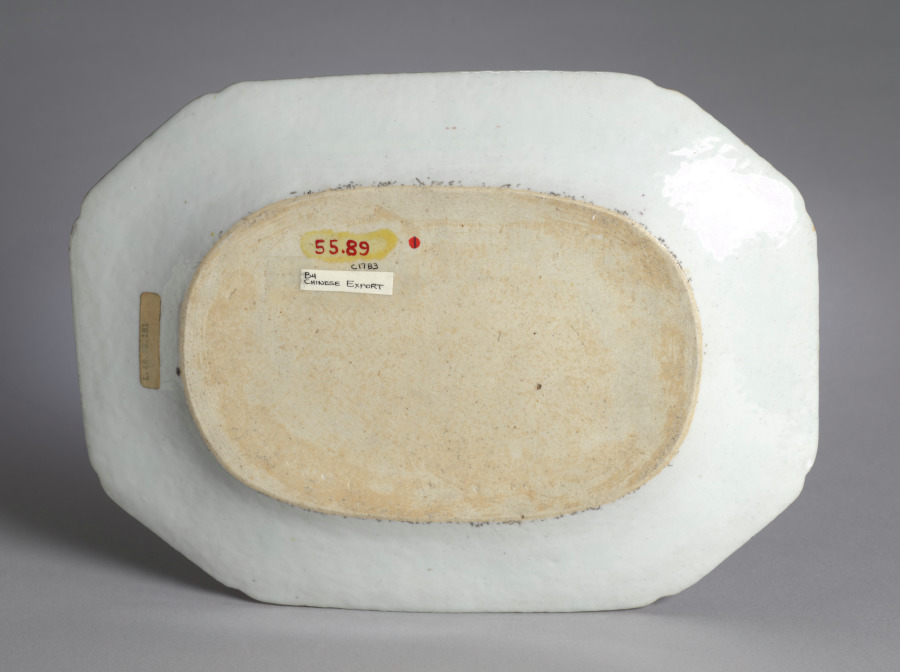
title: Platter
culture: China, Chinese Export, 18th century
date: 1770–85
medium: porcelain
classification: Ceramic